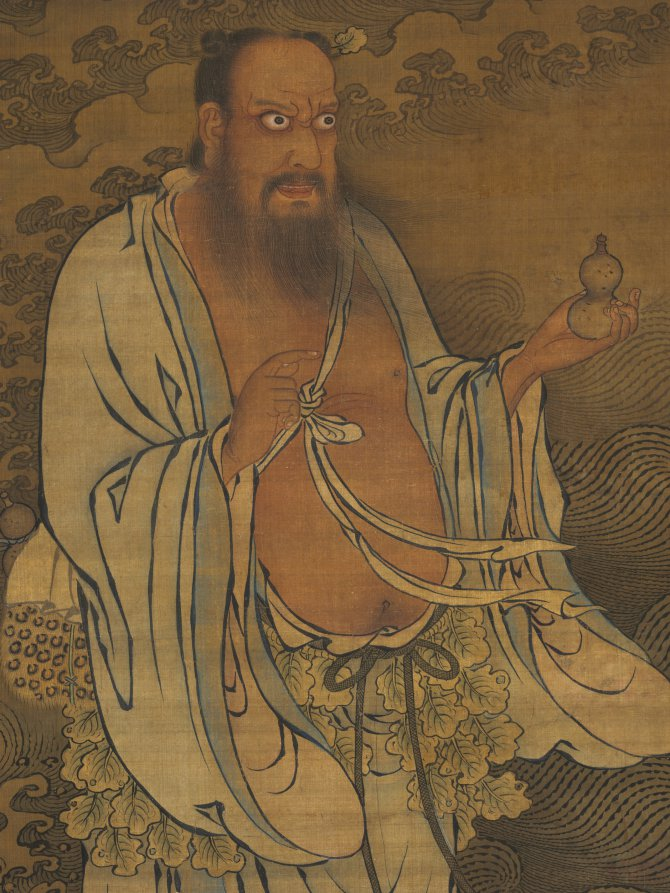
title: Zhongli Quan Crossing the Ocean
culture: China, Ming dynasty (1368–1644)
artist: Zhao Qi (Chinese, active early 1500s)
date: 1368–1644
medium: Hanging scroll; ink and color on silk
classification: Painting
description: Here, Zhongli Quan is crossing the ocean. He is one of the Eight Immortals (baxian), a group of popular Daoist figures who understood the way of life and could transform into otherworldly beings. Zhongli Quan is usually depicted as a scholar with a big belly seen through his partially open robe. The artist used expressive brushwork to depict the immortal’s fluttering robe and the roaring waves, skillfully creating a sense of movement. This scroll may have been one of a set depicting the Eight Immortals. Although the painting has no signature or seal, its style supports an attribution to the Ming dynasty painter Zhao Qi.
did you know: Zhongli Quan wears a girdle of leaves, a common Daoist immortal-recluse attribute.